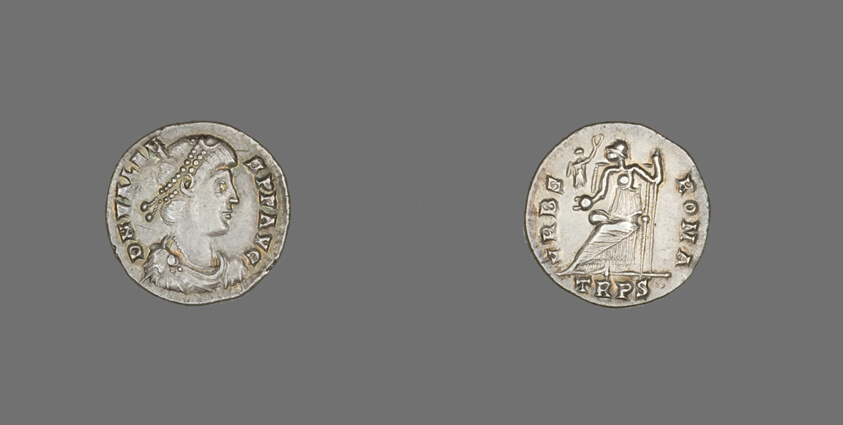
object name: Coin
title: Siliqua (Coin) Portraying Emperor Valens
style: roman (ancient, style or period)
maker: Roman, minted in Trier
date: 364-378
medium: Silver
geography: Trier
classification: coin; ancient art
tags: portrait